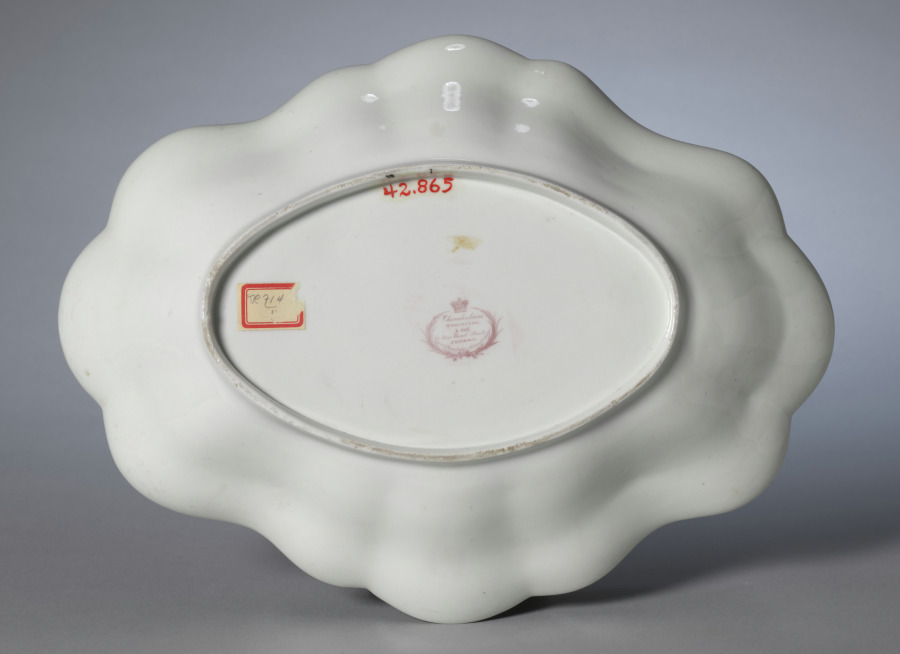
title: Dish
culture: England, 19th century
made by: Worcester Porcelain Factory (British, established 1751)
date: 1820–1840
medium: porcelain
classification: Ceramic